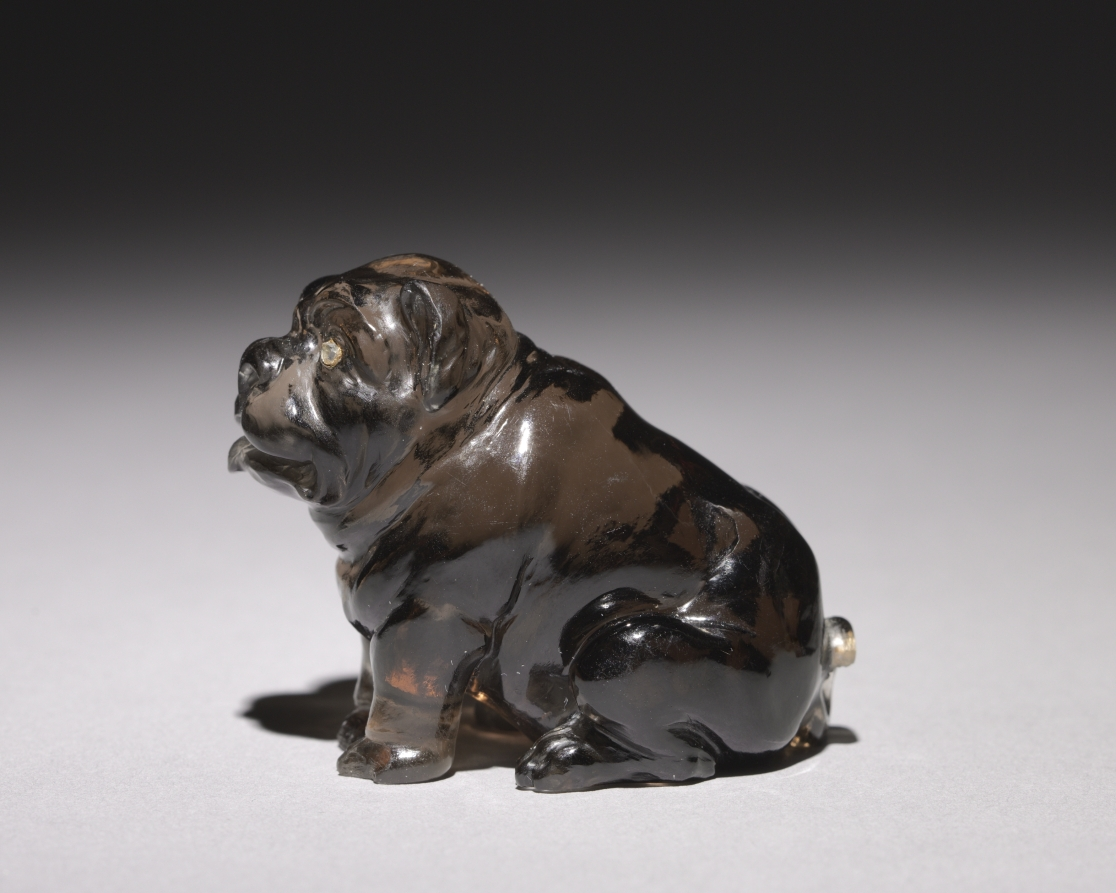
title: Bulldog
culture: Russia, St. Petersburg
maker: House of Fabergé (Russian, 1842–1918)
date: c. 1895–1915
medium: amethystine quartz, diamonds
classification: Miscellaneous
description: In creating luxurious accessories for a desk or tabletop, the House of Fabergé often used native hardstones such as multicolored agate and jasper, green nephrite, pink rhodonite, quartz, and rock crystal found in the Ural Mountains of western Russia. By paying careful attention to the unique colors and textures of the stones, Fabergé and his craftsmen brought them to life, turning smoky quartz into this figure of a seated bulldog, for example. The use of native materials also promoted Russian nationalism, which appealed greatly to the tsar and his family.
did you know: Fabergé's lapidaries carefully chose the stones to resemble the color and texture of the figure they were sculpting. The smoky quartz used for this bulldog was polished to resemble his dark shiny coat.